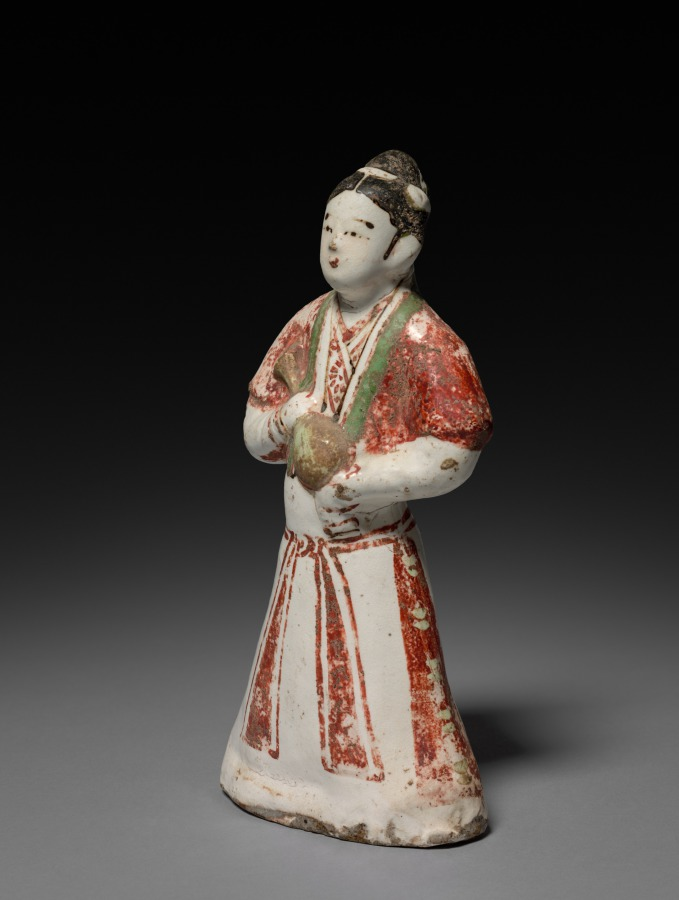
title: Lady Holding a Vase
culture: China, Northern Song dynasty (960-1127) - Jin dynasty (1115-1234)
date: 1100s–1200s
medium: Stoneware with slip decoration, Cizhou ware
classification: Ceramic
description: The Cizhou ware kilns never produced for the imperial court, but made potted utensils needed in daily life. They also fired ceramic figurines, which are believed to have been used as toys. The maid or palace lady here holds a long-necked vase of a type that watered flowers. The figurine, perhaps made as a toy for a girl, was molded in clay and covered with a white slip and transparent glaze, over which some colors in red, green, and ocher were applied. Cizhou kiln potters were one of the first in China who applied overglaze enamel-like colors on glazed, high-fired ceramics.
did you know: This hollow stoneware figure of a woman has firing hole visible at the bottom.